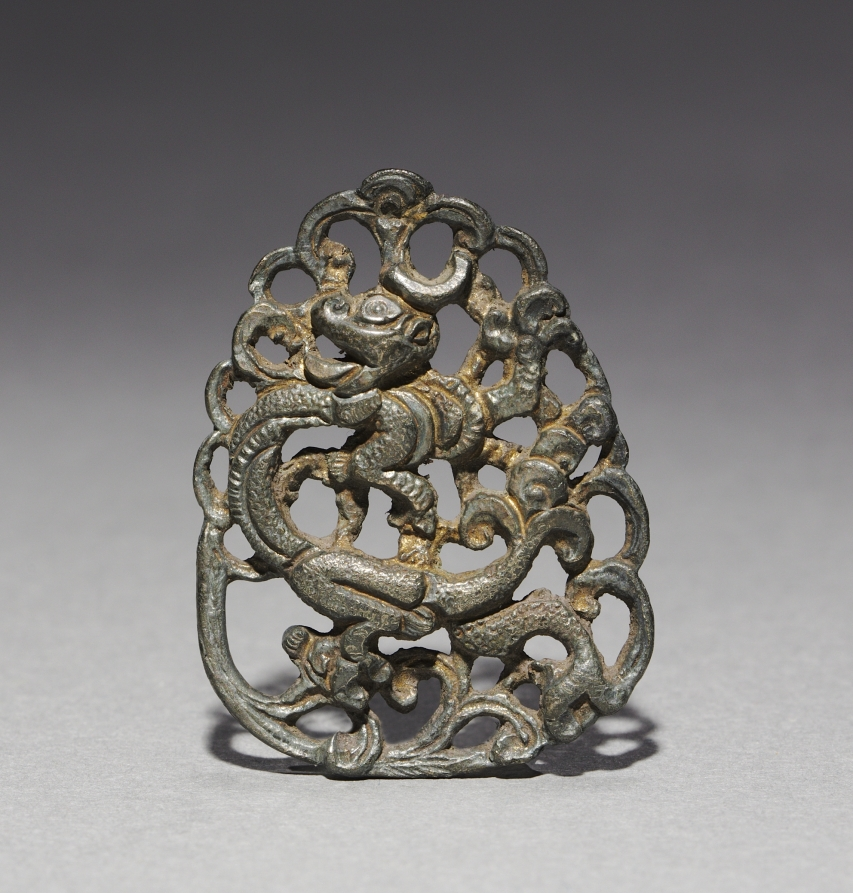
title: Ornament with Dragon Design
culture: Korea, Goryeo dynasty (918–1392)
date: 1100s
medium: bronze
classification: Metalwork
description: Metalworking techniques advanced remarkably during the Goryeo period (918–1392). Sophisticated metal objects with intricate designs were used not only as daily accessories, but also as burial goods for commemorating the dead. Traces of fibers found on the backs of these metal ornaments suggest that they were once used as brooches to hold garments together.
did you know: This metal ornament is part of a decorative brooch once used to hold clothes together.